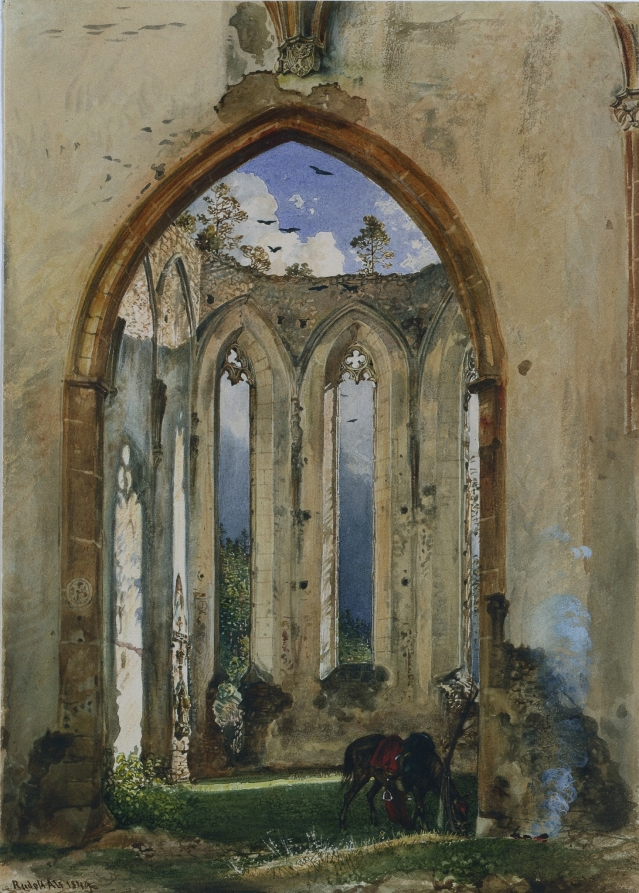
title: Ruin of a Church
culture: Austria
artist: Rudolf von Alt (Austrian, 1812–1905)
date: 1849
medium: watercolor with gouache and glazing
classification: Drawing